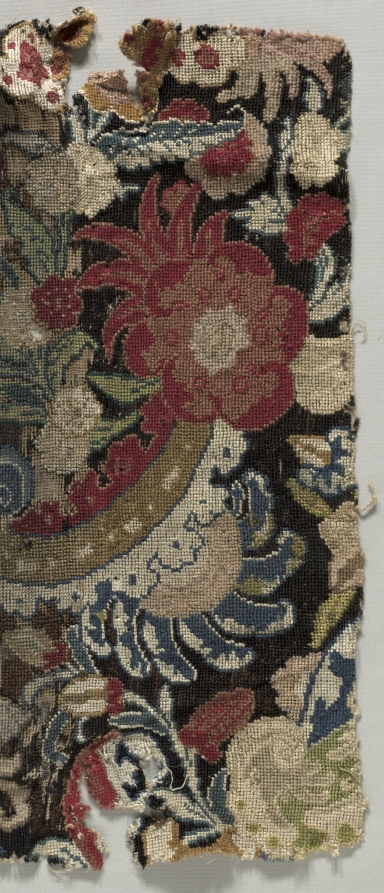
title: Armchair seat cover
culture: England, period of James II, 17th Century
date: 1685–1690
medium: needlepoint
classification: Embroidery